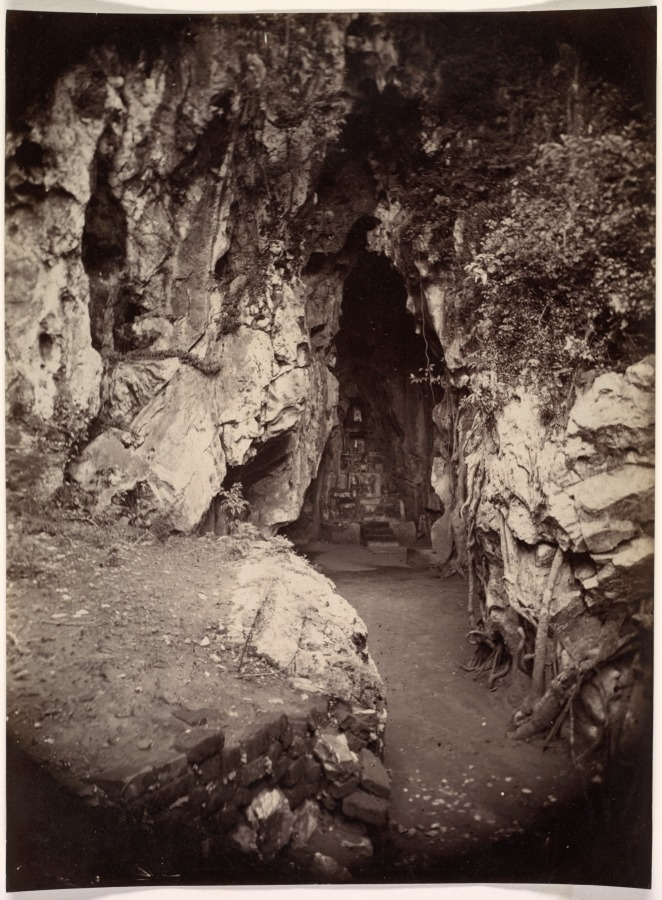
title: Hoa Nghiem Cave, Grotto of the August Transformation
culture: France, 19th century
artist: Émile Gsell (French, 1838–1879)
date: c. 1875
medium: Albumen print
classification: Photograph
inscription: Written in pencil on verso: "Les grottes de marbre/a Euuranne (loileinclieen) [indecipherable handwriting]" Written in pencil on verso: "585" Written in pencil on verso of mat: "Cambodia, Gsell c. 1876"